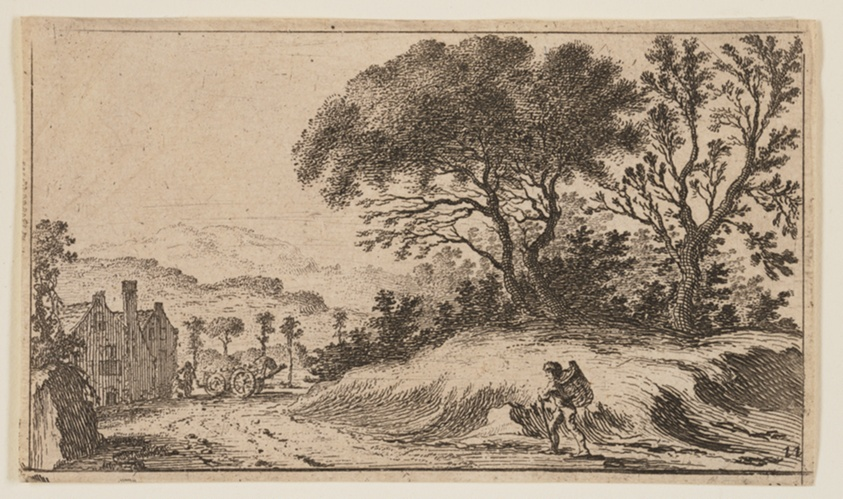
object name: Print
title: Traveler on a Path before Three Trees on a Knoll at Right, from Twelve Landscapes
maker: Gillis van Scheyndel (Dutch, 1595–1660)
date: c. 1605-1650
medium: Etching on ivory laid paper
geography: Netherlands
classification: etching; paper; print; prints and drawing